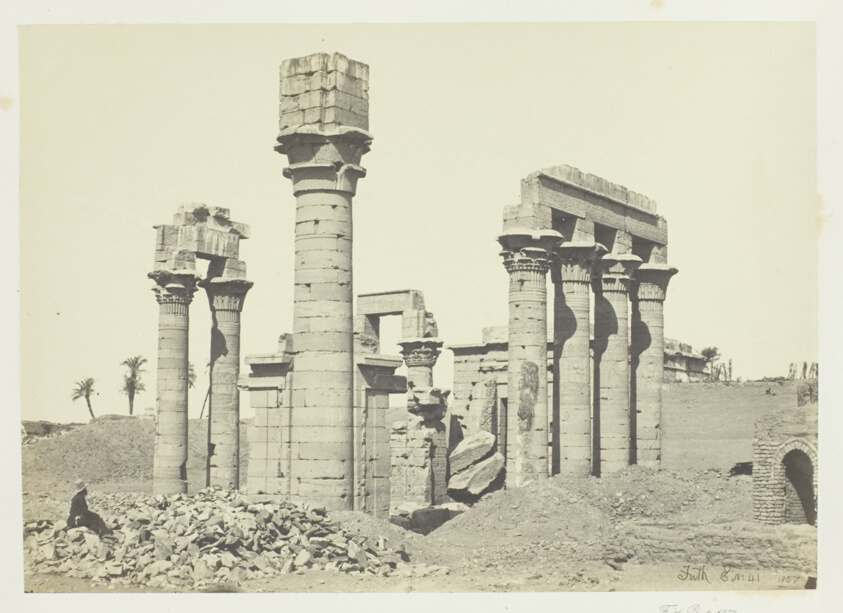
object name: Photograph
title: Cleopatra's Temple at Erment, near Thebes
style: 19th century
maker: Francis Frith (English, 1822–1898)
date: 1857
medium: Albumen print, pl. 5 from the album "Egypt and Palestine, Volume I" (1858)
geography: England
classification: photograph; albumen silver print; photography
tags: Collected by Hugh Edwards, Egypt and Palestine